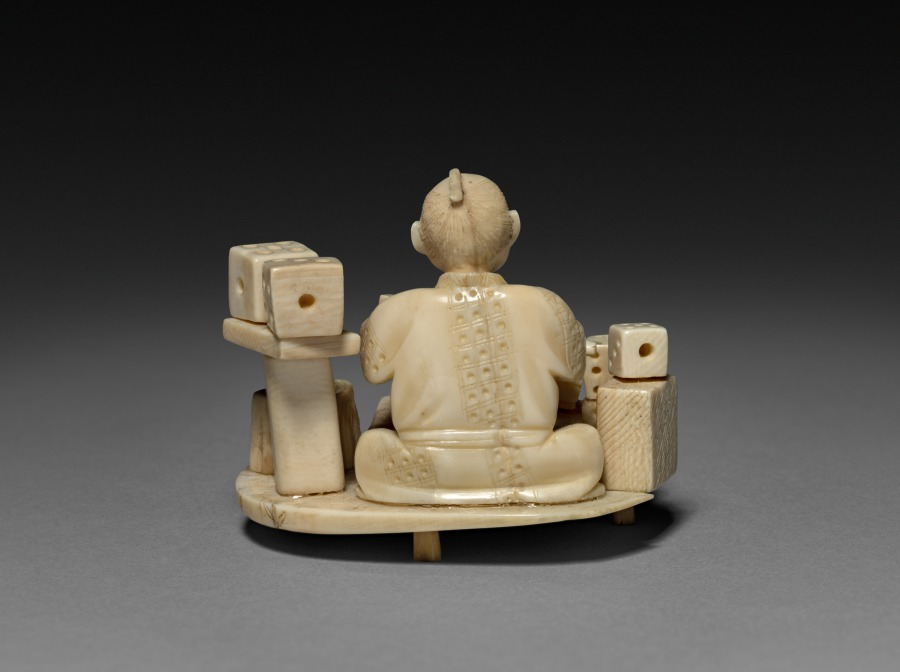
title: Man with Dice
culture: Japan, Edo period (1615–1868) to Meiji period (1868–1912)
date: 1800s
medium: ivory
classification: Netsuke